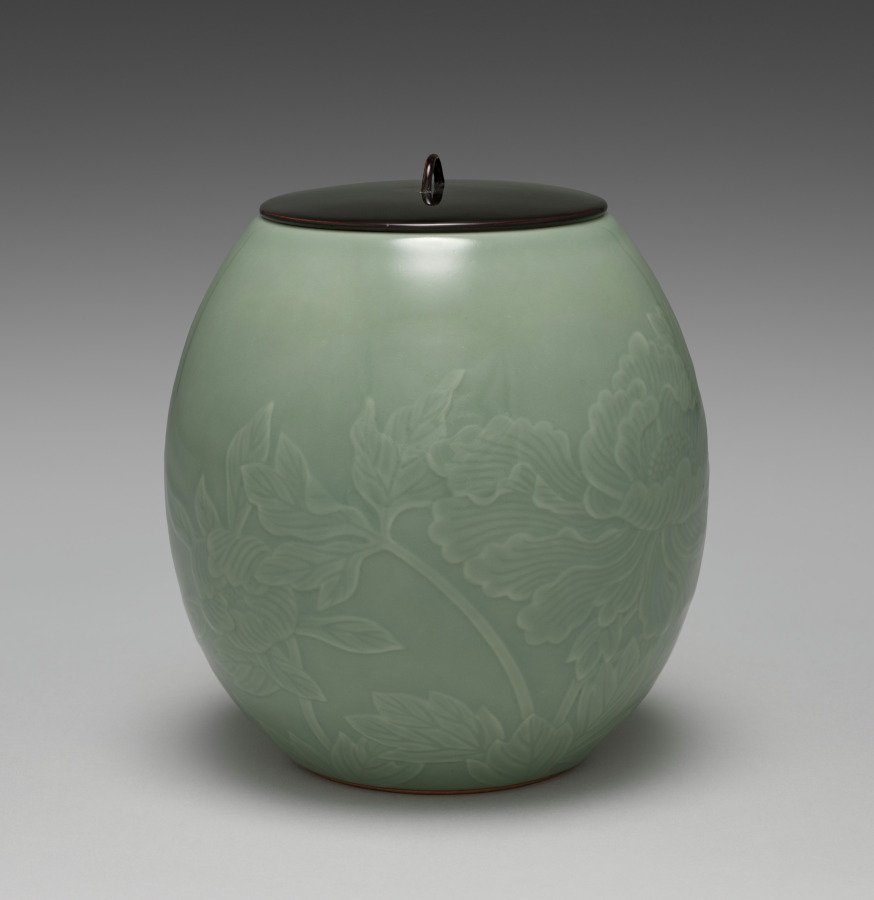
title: Water Container with Peonies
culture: Japan, Meiji period (1868–1912)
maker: Seifū Yohei III (Japanese, 1851–1914)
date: 1900–1914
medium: Porcelain with molded and carved design, green glaze, and black lacquered lid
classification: Ceramic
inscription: 清風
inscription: 帝室技芸員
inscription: 清風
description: This ceramic is an especially accomplished example of Yohei III’s combination of an allover translucent colored glaze with molded and carved designs. It features the peony as its primary motif. The water container, or mizusashi, has a green glaze, and its design takes into consideration the rounded shape and the seated position of the host and guests. It begins low on the body with a flower just beginning to open and continues with another flower a bit higher up, with its petals fully extended and beginning to open outward. It finishes with a flower in full bloom, petals and leaves unfurled and spread outward from the center, now occupying almost the entire surface. The water container once belonged to the Hosokawa family, whose go-between corresponded with Yohei IV about the piece. Yohei IV thanked them for their payment and requested that despite his father’s death in the previous year, they continue to favor the studio with their orders. The letter and its envelope, as well as an auction tag, remain with the object.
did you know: This water container may also serve as a site for cultural reckoning, as when the life cycle of a flower prized in East Asia as a symbol of wealth is displayed across a Japanese chanoyu vessel whose glaze is associated with the seats of power in China and Korea.